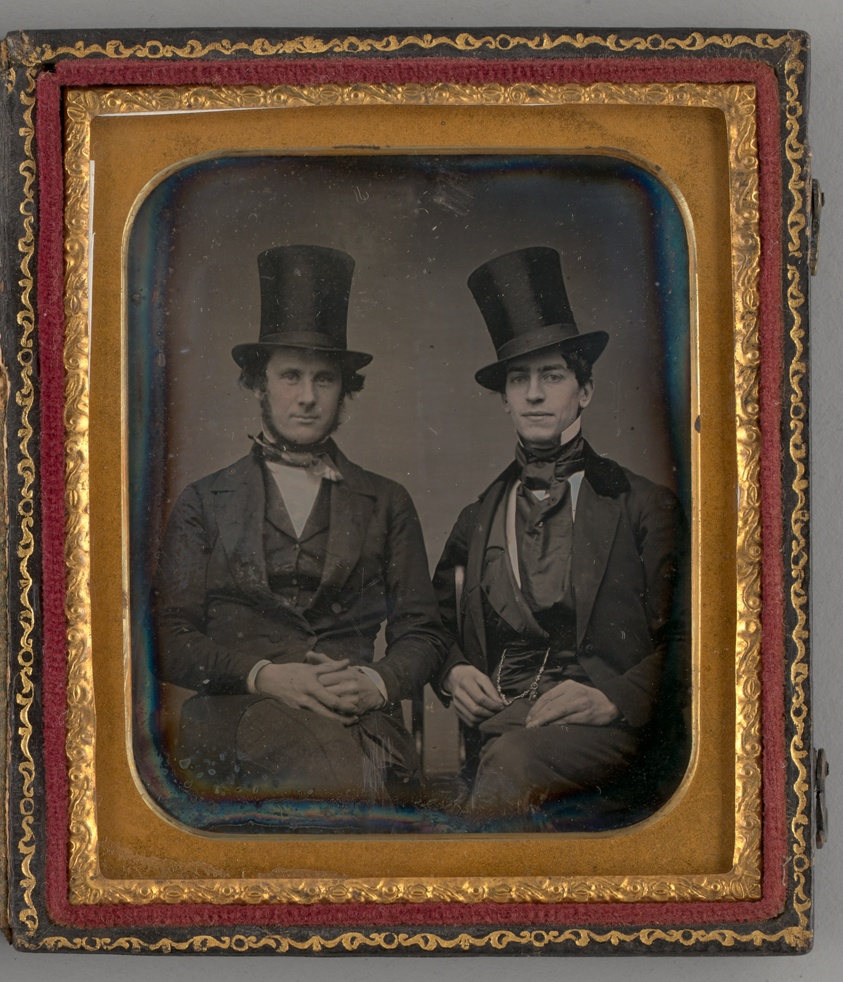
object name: Photograph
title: Untitled (Portrait of Two Men with Top Hats)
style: 19th century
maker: Unknown maker; American, 19th century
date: 1855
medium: Daguerreotype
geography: United States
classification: portrait; photograph; photographic process; photography; portrait; daguerreotype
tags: lundberg collection, portraits: multiple subjects, portraits: male subject, portrait, photography, hats, portraits